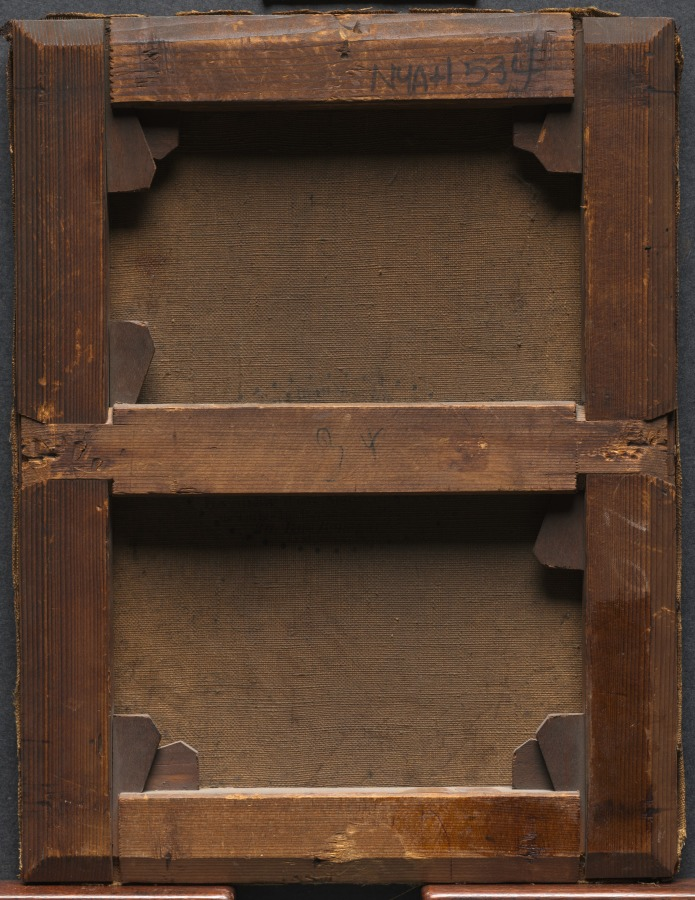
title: Destitute Dead Mother holding her sleeping Child in Winter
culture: France, 19th century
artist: Octave Tassaert (French, 1800–1874)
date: c. 1850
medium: oil on canvas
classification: Painting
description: One of France's leading artists of the mid-19th century, Octave Tassaert was known for his paintings of downtrodden workers, destitute mothers, suicides, and abandoned children. Viewers responded positively to his focus on issues of social injustice, as seen in this painting of a poor mother resting outdoors in the show with her baby. She is leaning against a pile of sticks, a common activity among the poor of gathering and selling small pieces for wood for burning in fireplaces or stoves.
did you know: Greatly admired by writers and social activists, Octave Tassaert provided illustrations for books by such celebrated authors as Alexandre Dumas père and Victor Hugo.